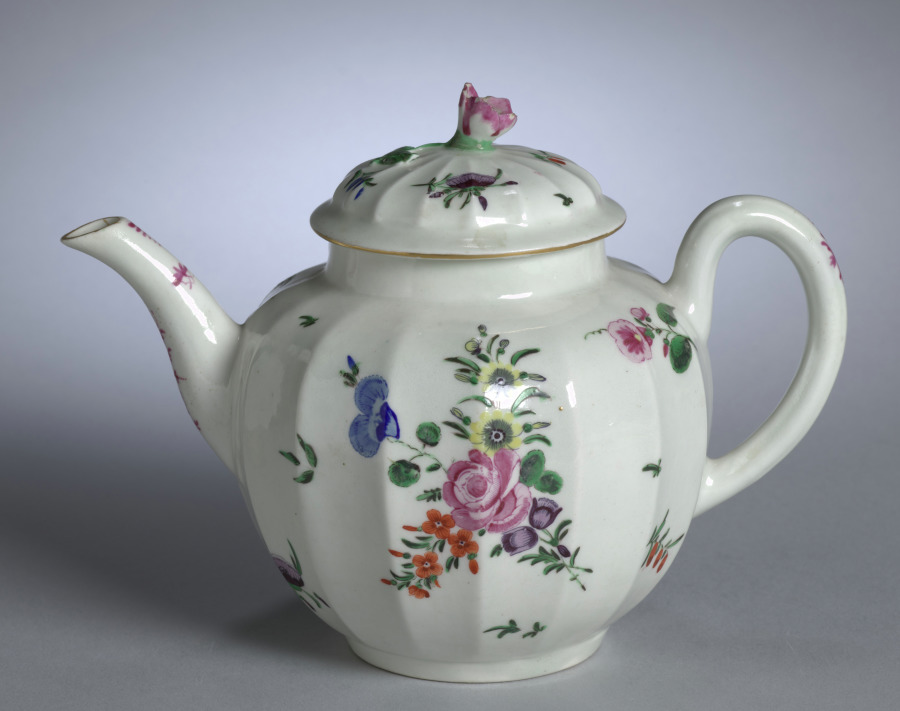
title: Teapot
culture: England, Worcester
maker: Worcester Porcelain Factory (British, established 1751)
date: c. 1755–75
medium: porcelain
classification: Ceramic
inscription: Mark on the bottom - An X with radiating lines inside a box.